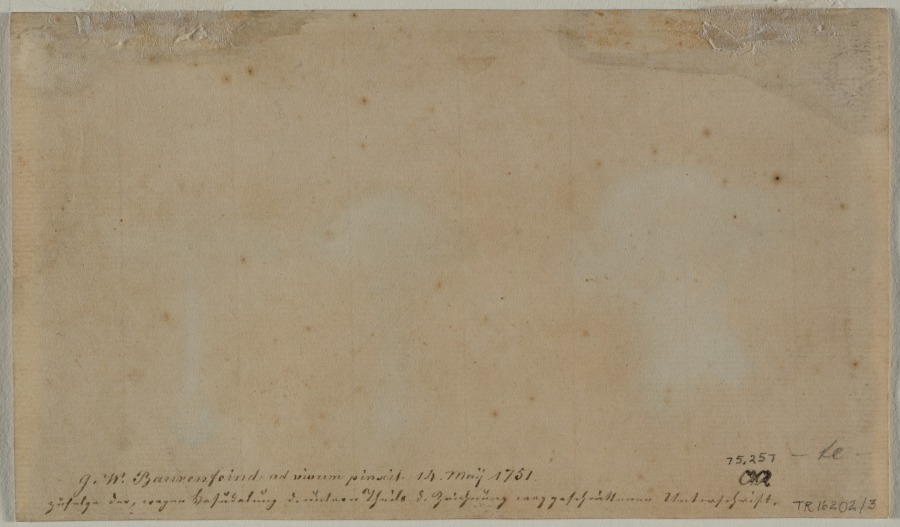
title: Mushrooms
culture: Germany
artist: Georg Wilhelm Baurenfeind (German, c. 1710–1763)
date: 1751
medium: brush and brown wash and gouache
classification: Drawing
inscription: VERSO, signed, across bottom, in brown ink: G.W. Baurenfeind ad vivum pinxit 14. Maij 1751 / [illegible] Zeichnüng [illegible]Unterschrift ; lower right, in graphite: [-Re-?]